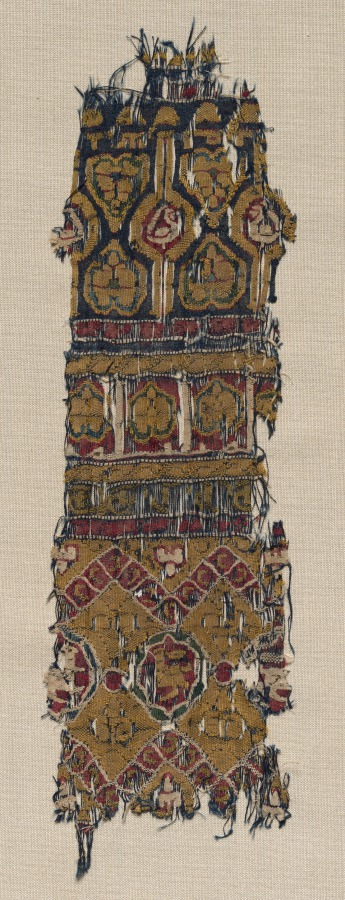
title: Fragment of a Tiraz-Style Textile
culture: Egypt, Fatimid period, Caliphate of al-Mustansir or al-Musta'li, c. AH 475-495 (A.D. 1081-1101)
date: 1081 – 1101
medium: tapestry (probably originally inwoven in tabby ground); linen and silk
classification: Textile